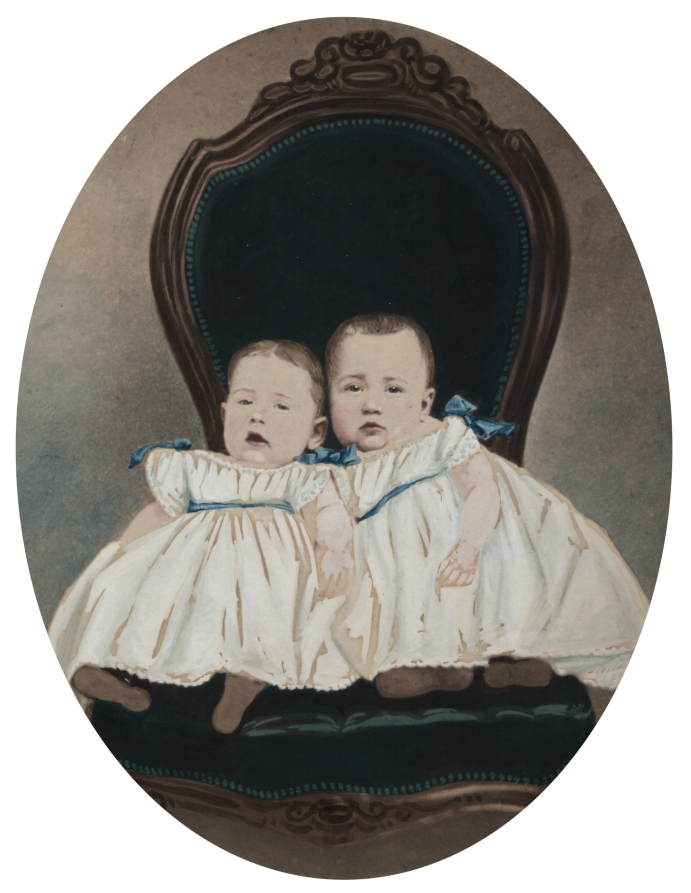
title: Twin Babies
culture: America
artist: Davis Brothers (American)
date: c. 1870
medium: salted paper print, hand-colored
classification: Photograph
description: Color photography was not widely available until the 20th century, but 19th-century photographs could be embellished with hand-applied paints or dyes for an extra charge. Hand coloring, often done by women, usually was limited to adding dabs of pink on lips and cheeks or gold on jewelry, but sometimes, as here, the entire surface would be covered to emulate a painting. The edges of this mount are covered with trial dabs of watercolor that would have been hidden by the mat. Once portraits leave the context of the family, the identities of the sitters are most often lost, as is the case for these twins. Since the Davis Brothers’ studio was in Portsmouth, New Hampshire, around this time, one can assume the twins lived there.